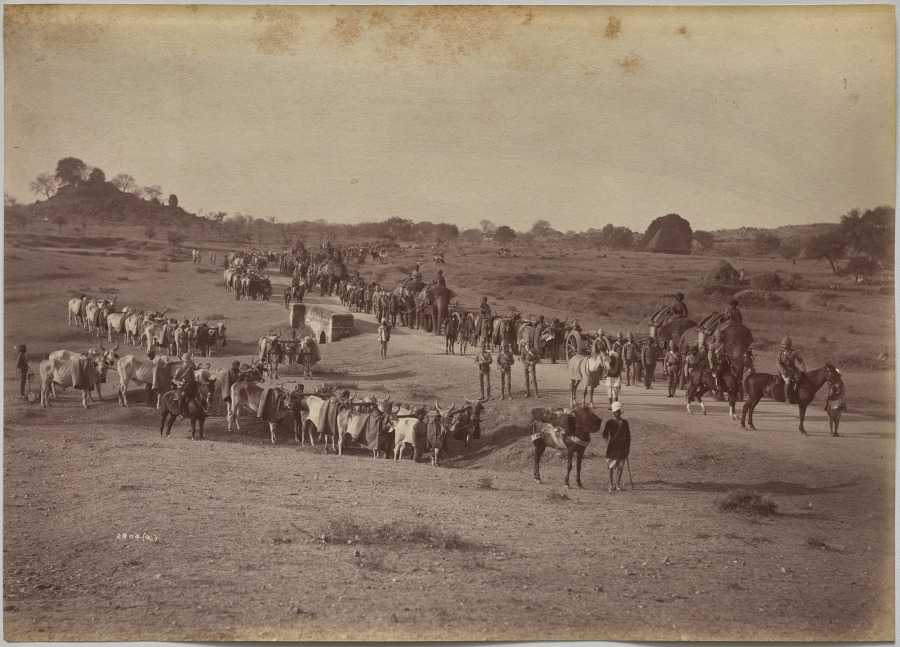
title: Elephant Battery on March at Jhansi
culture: India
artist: Raja Deen Dayal (Indian, 1844–1905)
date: c. 1882–87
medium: albumen print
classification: Photograph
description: These photographs are part of an album, now disassembled, of around 105 photographs taken in India between 1885 and summer 1887 that provide glimpses into the lives of the British colonial elite and royal and upper-class Indians. The museum holds another group of 37 pictures from this album (2016.266), which was probably commissioned by a British civil servant visiting or working in India around 1888 as a personal souvenir of his experiences there.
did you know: Raja Deen Dayal is regarded now, and was considered during his lifetime, to be India’s most important 19th-century photographer.